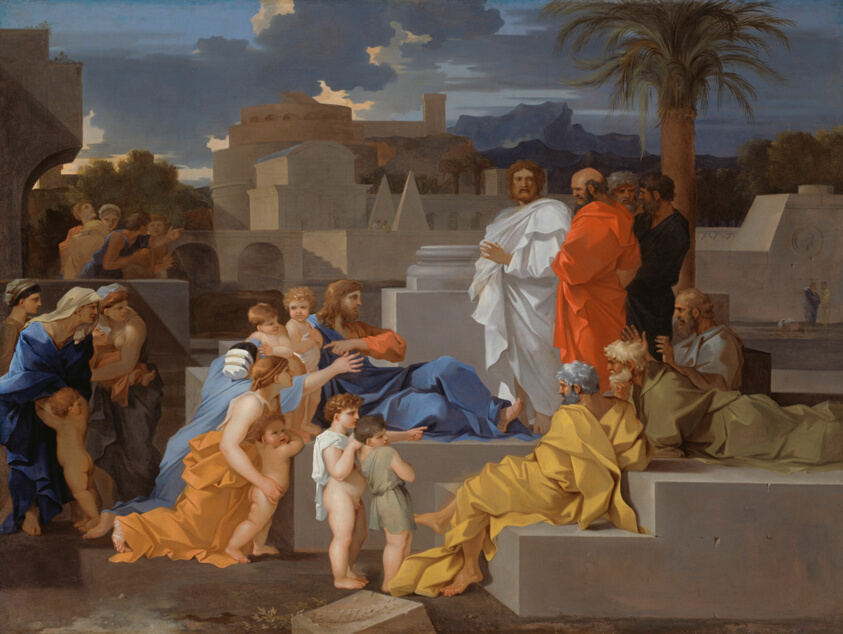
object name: Painting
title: Christ Receiving the Children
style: 17th Century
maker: Sébastien Bourdon (French, 1616–1671)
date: c. 1655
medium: Oil on canvas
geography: France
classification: oil on canvas; french; oil paintings (visual works); paint; painting; european painting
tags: Christian subjects, palms, trees, towns, landscape, saints, women, men, children, Christianity, religious, religion, Jesus, mountain